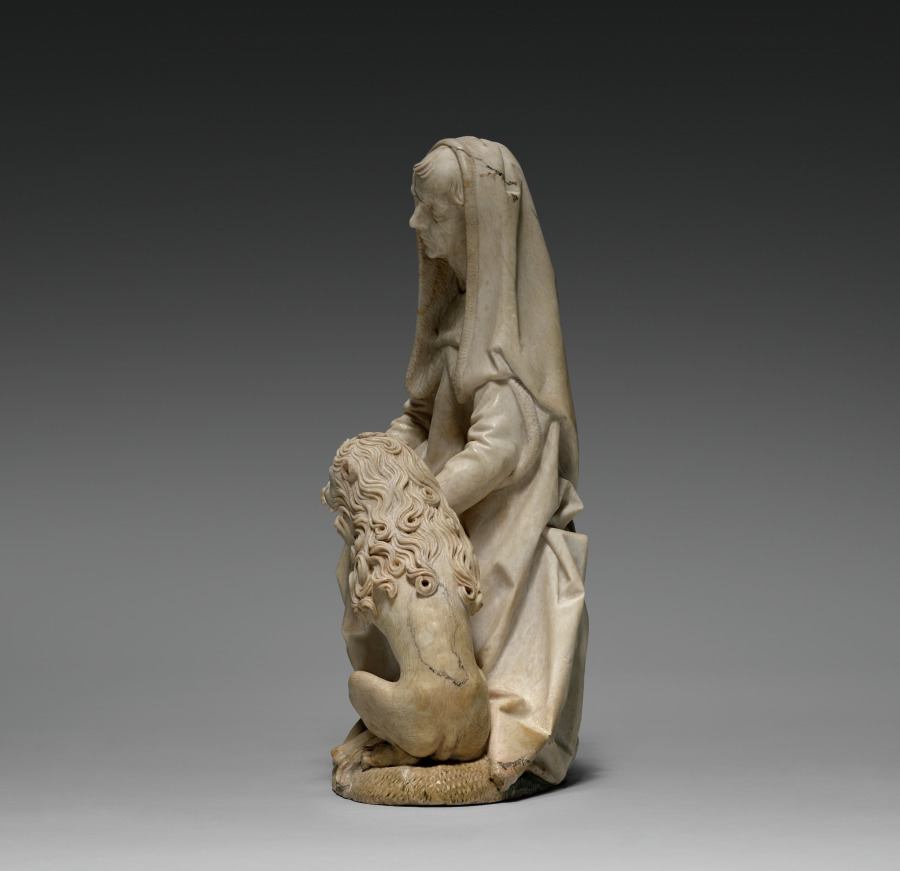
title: Saint Jerome and the Lion (From the former Church of St. Peter in Erfurt)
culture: Germany, Würzburg, late 15th Century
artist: Tilman Riemenschneider (German, active Würzburg, c. 1460–1531)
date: c. 1495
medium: alabaster, traces of polychromy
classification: Sculpture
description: According to legend, Saint Jerome (347–420 bce) lived in the desert, where he removed a thorn from an injured lion. Jerome is venerated in the Catholic Church as a Church Father, an important early author of Christianity. Here, he wears cardinal’s clothing from around 1500. Tilman Riemenschneider focused on Jerome’s relationship with the lion, creating empathy for the wounded animal. The delicacy of the depiction, which may have been partially painted to add highlights, is typical of alabaster, as is its fine polishing. The cord of the cardinal’s hat, missing today, may have been supplemented from another material.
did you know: In the story Saint Jerome encounters a fearsome lion, here depicted as diminutive, gentle, and submissive.